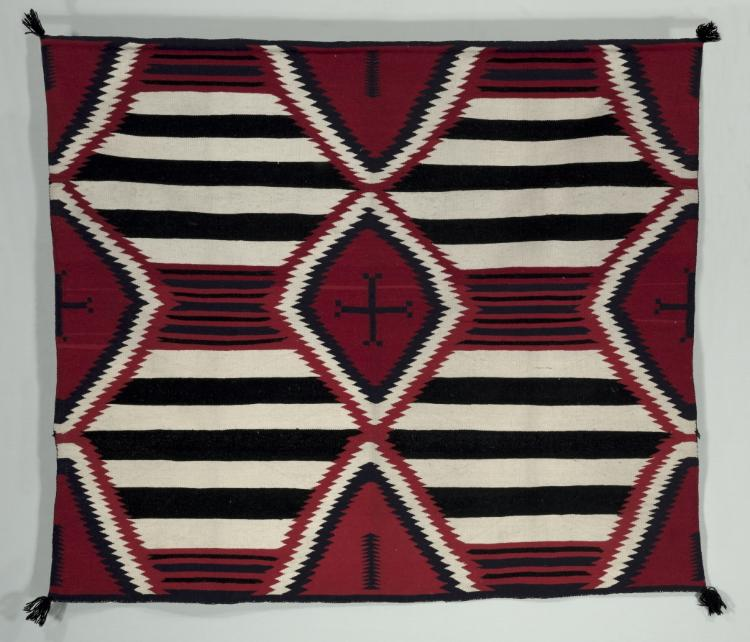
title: Fourth-Phase Chief Blanket Style Rug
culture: Native North America, Southwest, Diné (Navajo)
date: c. 1900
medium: tapestry weave: wool (handspun, Germantown, and bayeta)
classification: Textile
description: This rug is modeled on a coveted Diné (Navajo) garment type—a waterproof blanket worn around the shoulders. By the late 1700s, other Natives traded avidly for such blankets, which are classified according to design phases and known as “chief’s blankets,” a misnomer since the Diné have no chiefs. In the late 1800s, old Indigenous trade outlets collapsed, especially after the disastrous imprisonment of the Diné at Bosque Redondo in the 1860s. Responding to the dramatically transformed landscape in the aftermath, Diné weavers began to shift from making garments for Indigenous use, including trade, to creating items for the outside collectors’ market, such as rugs like this one.